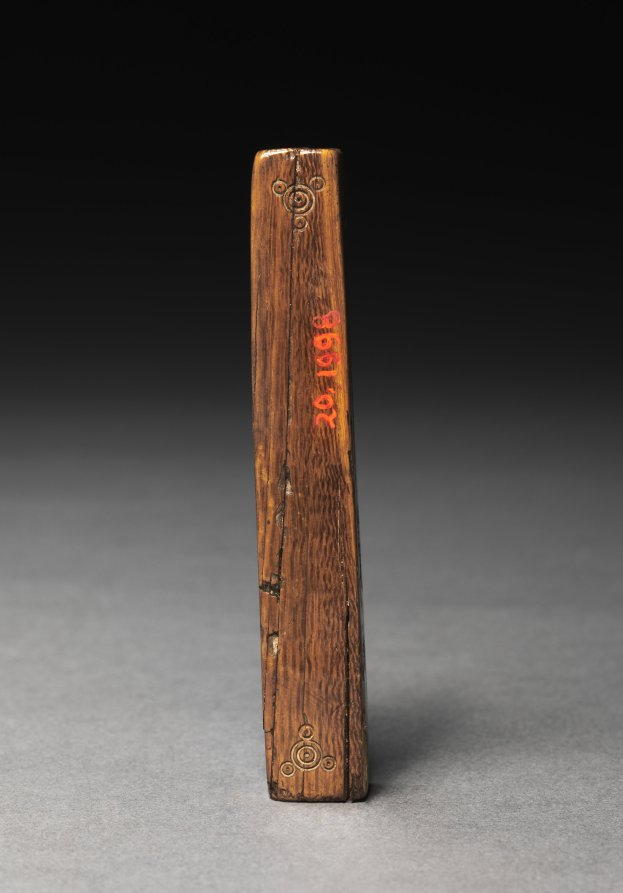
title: Talus or Die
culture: Egypt, Greco-Roman period (332 BCE–395 CE), Roman empire (30 BCE–395 CE)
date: 30 BCE–395 CE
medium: ivory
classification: Implements